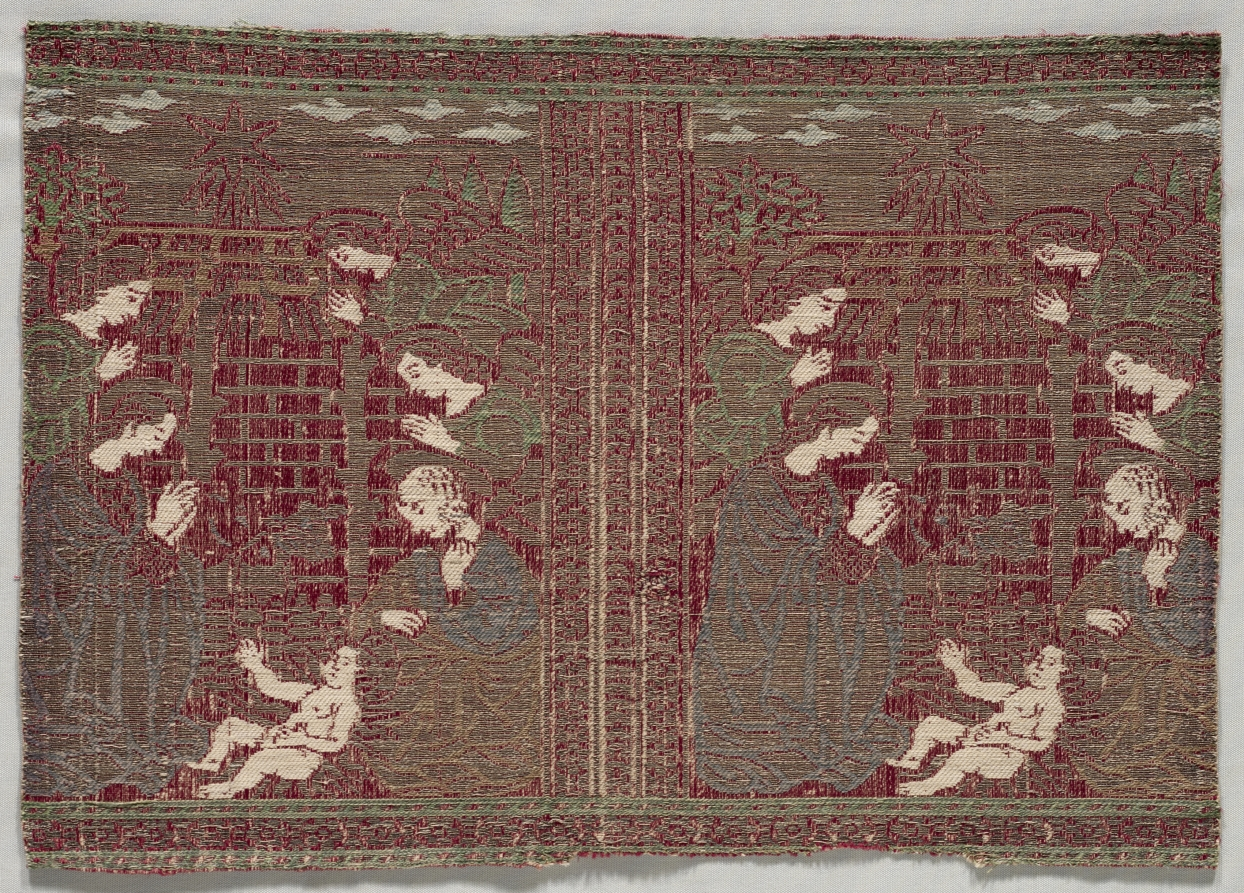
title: Woven Strip for Ecclesiastical Parameters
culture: Italy, Florence, early 16th century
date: early 1500s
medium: lampas weave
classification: Textile